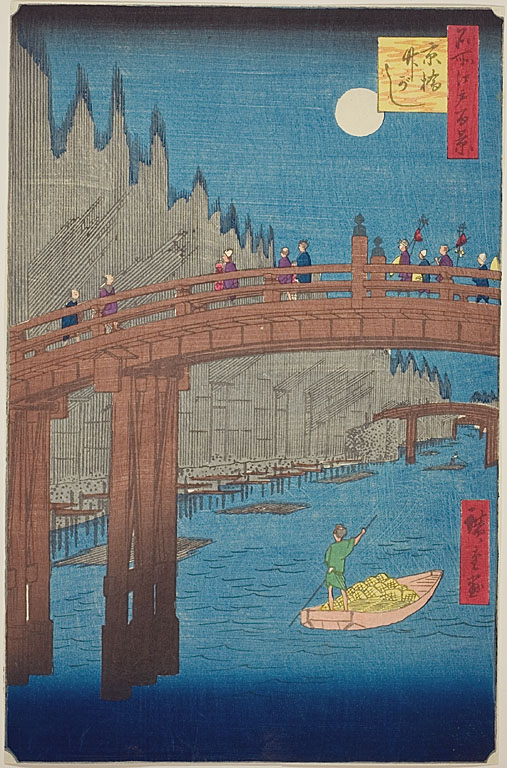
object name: Print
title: Bamboo Yards and Kyo Bridge (Kyobashi Takegashi), No.76 from the series "One Hundred Famous Views of Edo (Meisho Edo hyakkei)"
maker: Utagawa Hiroshige (Japanese, 1797-1858)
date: 1857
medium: Color woodblock print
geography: Japan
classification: woodblock print; print; asian art